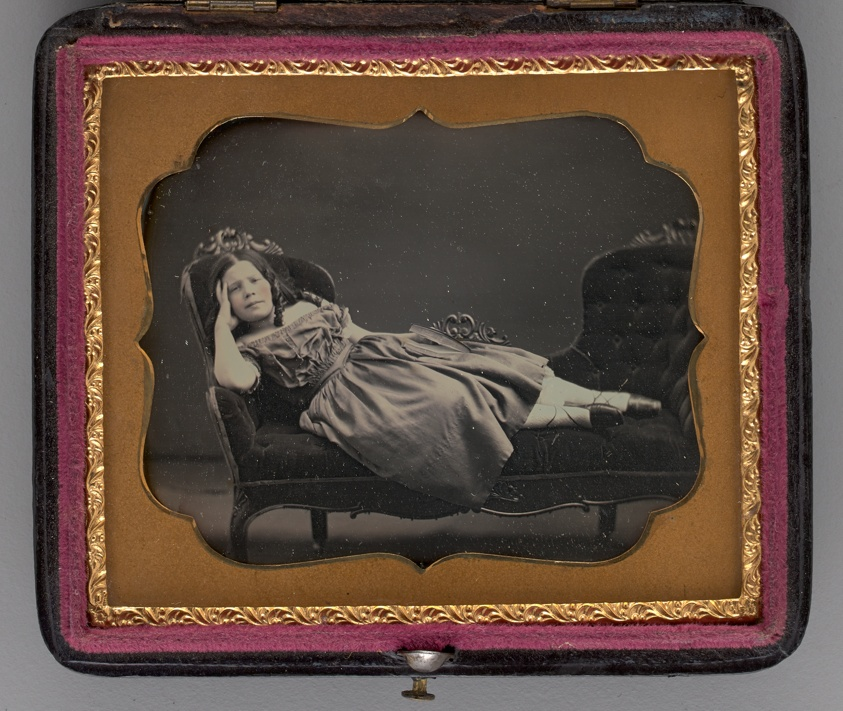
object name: Photograph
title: Untitled (Portrait of a Reclined Woman)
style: 19th century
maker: John Adams Whipple (American, 1823-1891)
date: 1855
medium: Daguerreotype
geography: United States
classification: portrait; photograph; photographic process; photography; portrait; daguerreotype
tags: lundberg collection, reclining, portrait, female, portraits, portraits: female subject